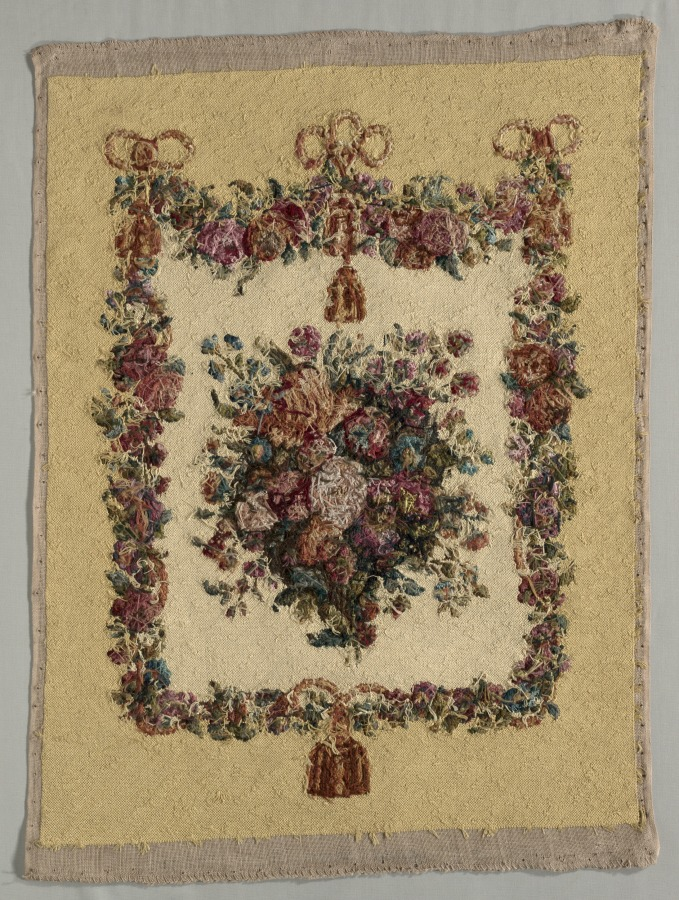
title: Textile Panel for Fire Screen (replacement)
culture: France, Paris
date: c. 1780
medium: needlepoint, wool on linen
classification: Textile